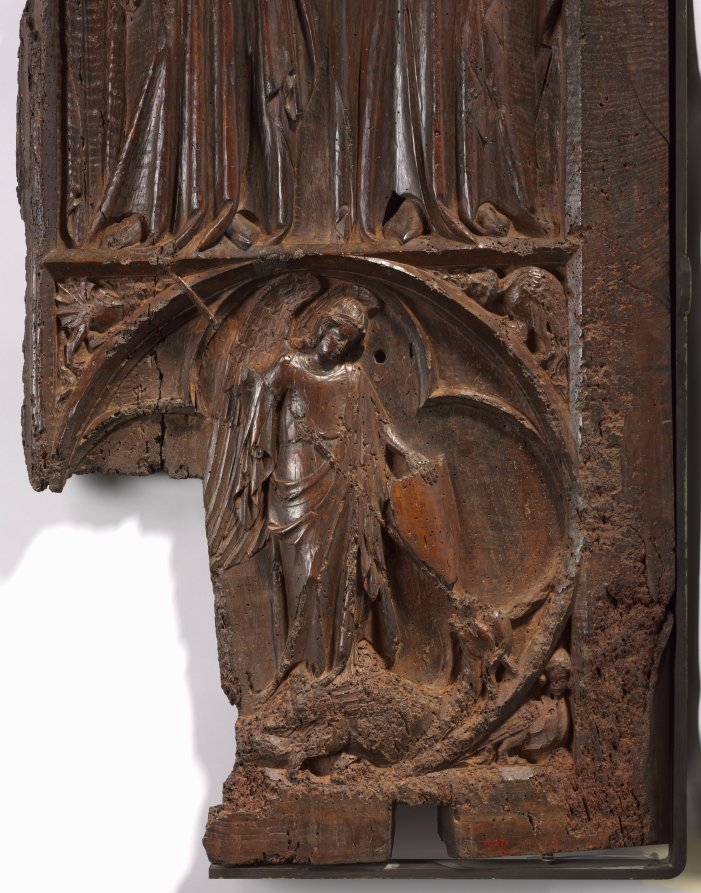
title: Panel from a Choir Stall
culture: Spain, Catalonia, Monastery of Pedralbes, 14th century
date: c. 1330–1340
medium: walnut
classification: Furniture and woodwork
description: The large panel shown here was probably the end panel of a stall that faced another across the choir of a Gothic church. The panel is carved with the figure of St. Francis of Assisi kneeling in prayer and receiving the stigmata. Two standing figures also appear on this panel: a nun at the left (perhaps St. Claire) and a female martyr at the right. Below is St. Michael and the dragon.